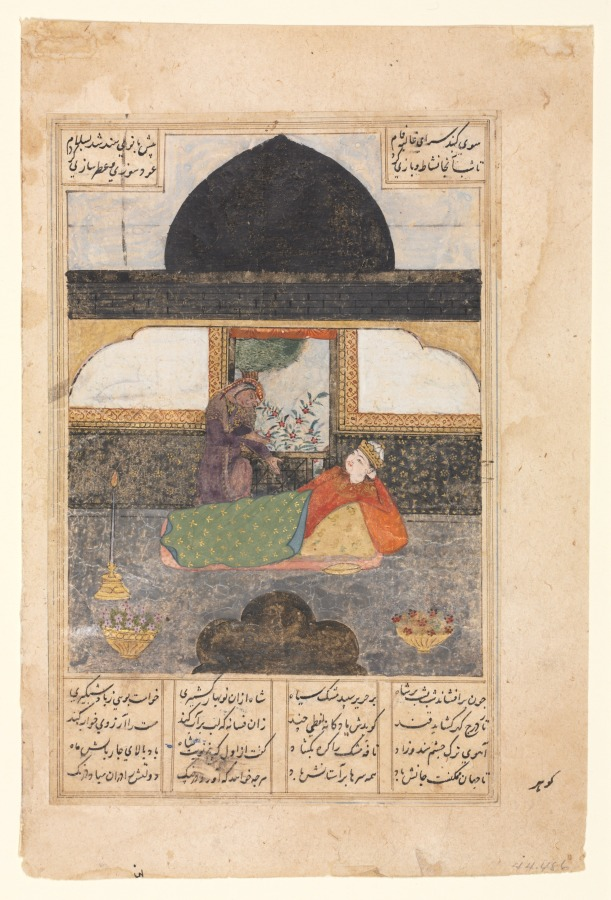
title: Bahram Gur Visits the Princess of India in the Black Pavilion, Illustration and Text, Persian Verses (recto); Bahram Gur Visits the Princess of India, Text Page, Persian Verses (verso)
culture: Iran, possibly Tabriz or Shiraz, Timurid Period, early 15th century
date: c. 1400–1410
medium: opaque watercolor and ink on paper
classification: Manuscript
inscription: script: Nasta'liq